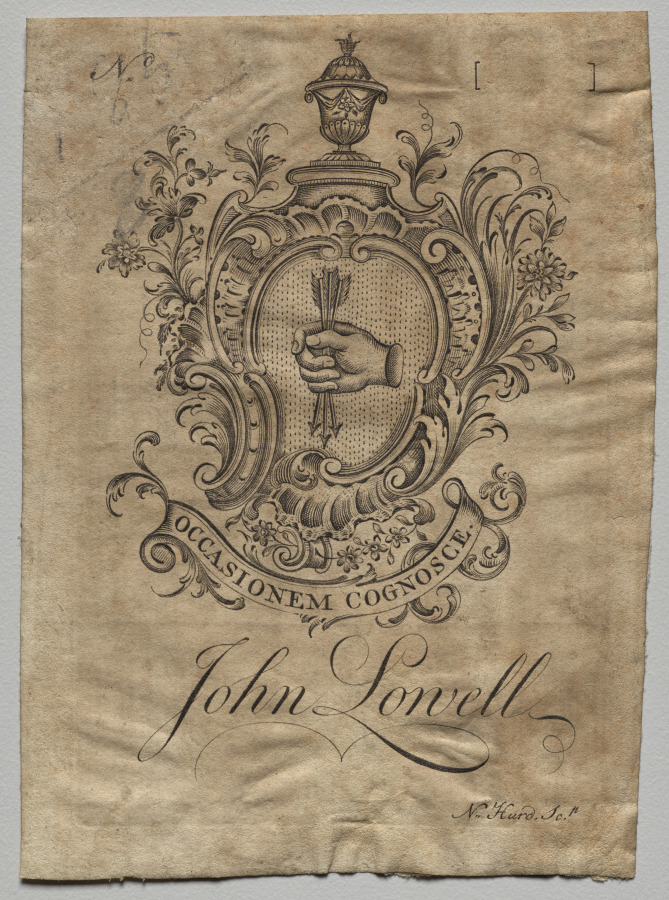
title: Bookplate: Coat of Arms with John Lowell inscribed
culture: America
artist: Nathaniel Hurd (American, 1730–1778)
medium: engraving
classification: Print